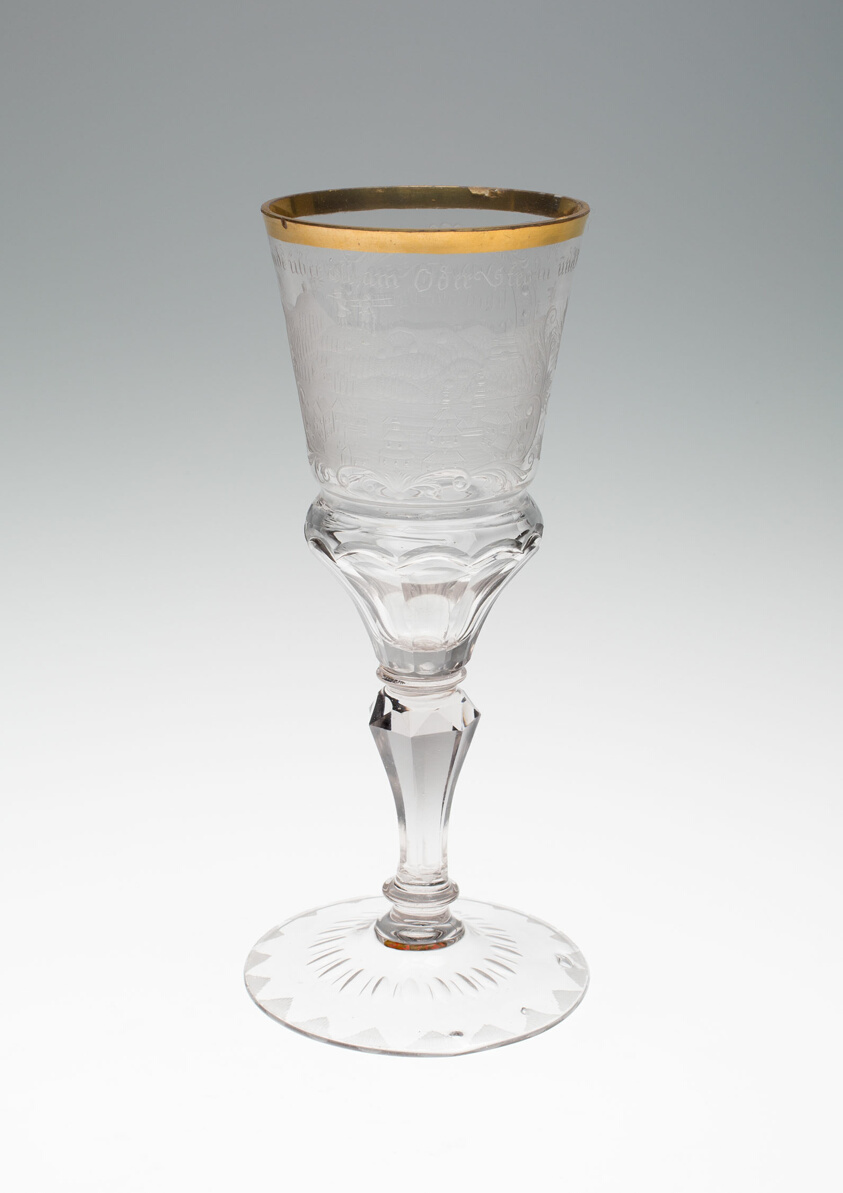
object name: Glass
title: Goblet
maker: Germany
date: c. 1750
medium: Glass with gilding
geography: Germany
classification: drinking vessel; glass; european decorative arts